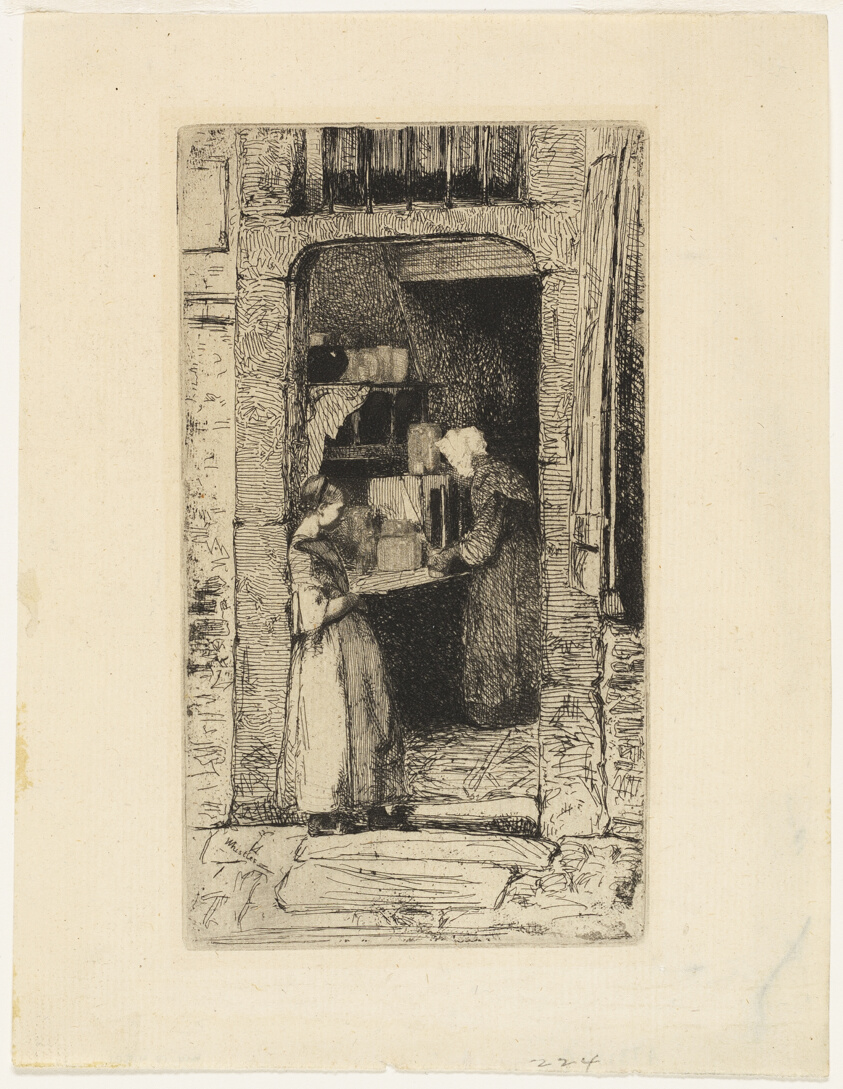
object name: Print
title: La Marchande de Moutarde (The Mustard Seller)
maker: James McNeill Whistler (American, 1834-1903)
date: 1858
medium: Etching with foul biting in black ink on cream laid paper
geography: United States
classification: etching; foul biting; print; prints and drawing; paper